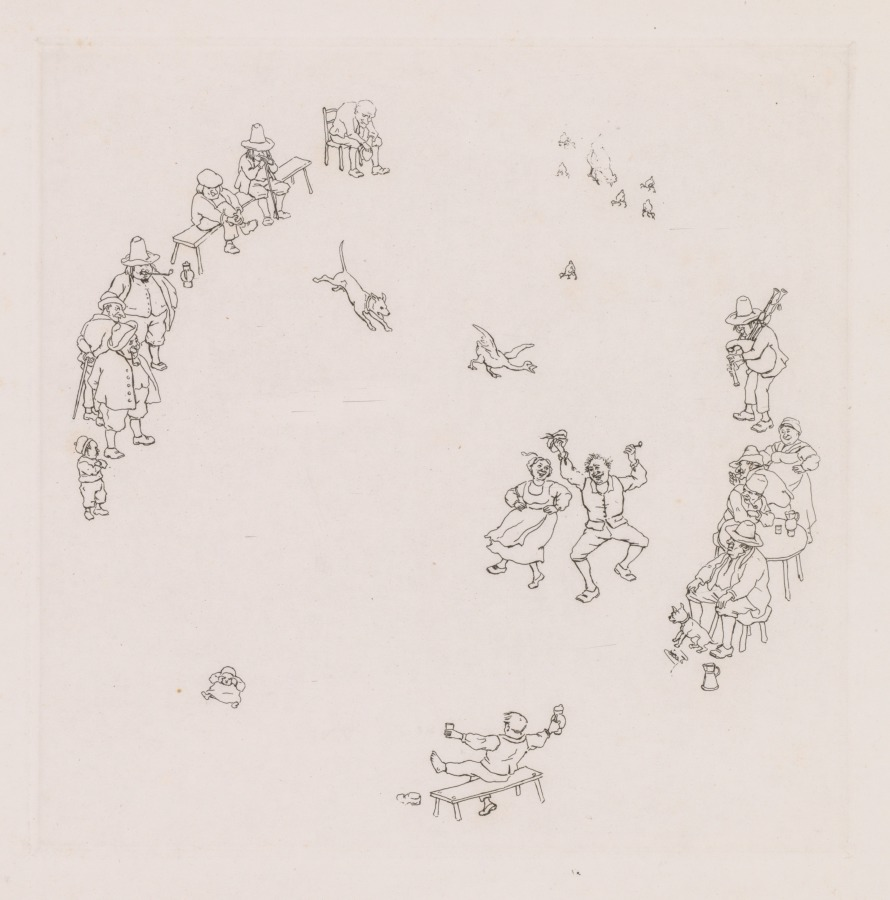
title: Revelers (Ribauds et Ribaudes)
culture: France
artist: Léonce Justin Alexandre Petit (French, 1839–1894)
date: late 1800s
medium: etching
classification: Print